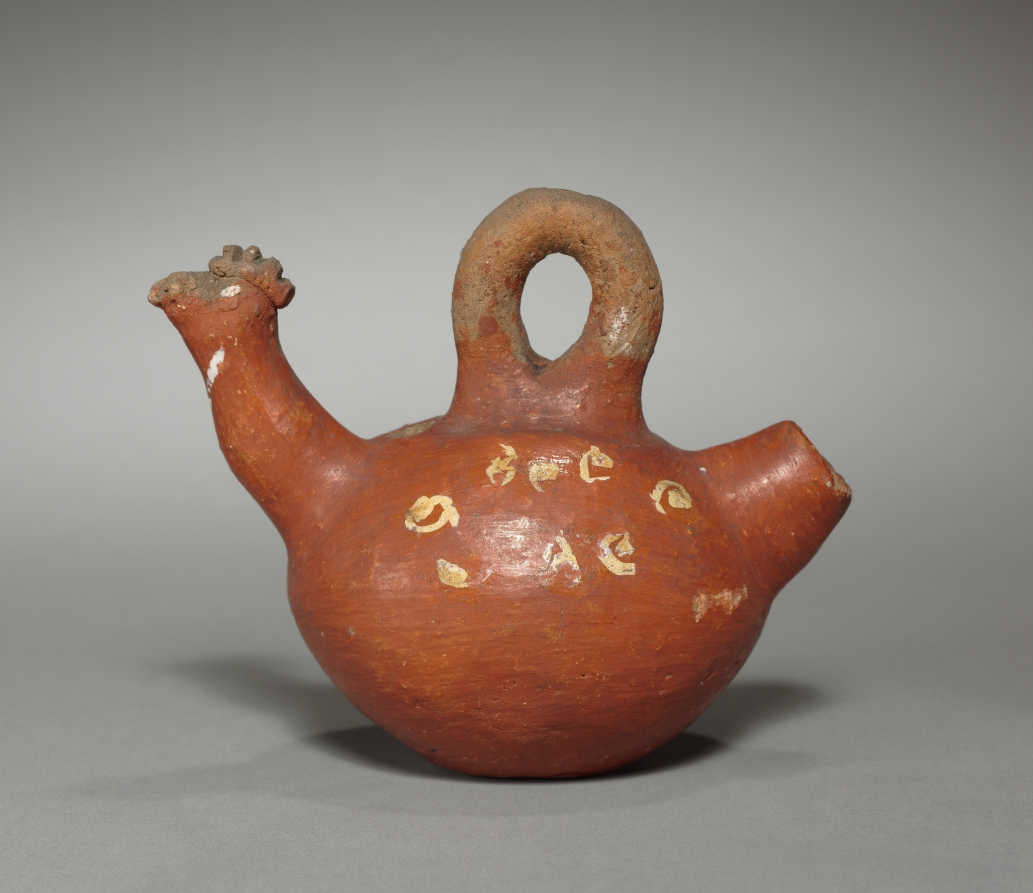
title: Bottle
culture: Peru, 20th century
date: 1900–1920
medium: pottery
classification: Ceramic